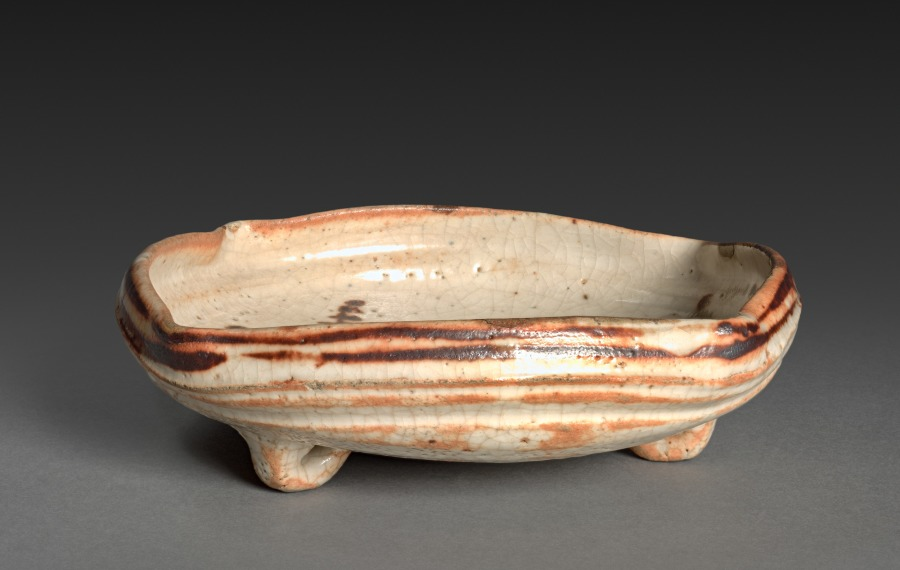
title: Dish with Design of Plum Trees: Shino Ware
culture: Japan, Momoyama period (1573–1615)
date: late 1500s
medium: stoneware with underglaze iron slip decoration (Mino ware)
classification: Ceramic